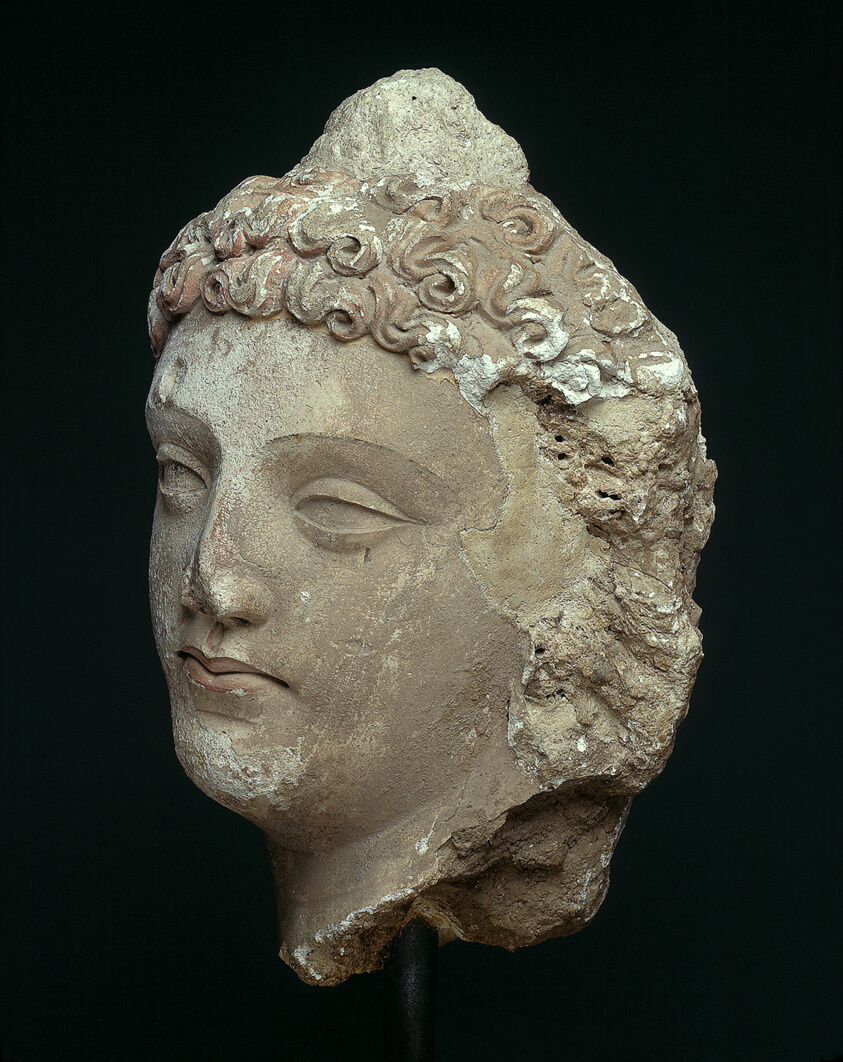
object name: Sculpture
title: Head of a Bodhisattva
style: South Asian, gandharan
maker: Afghanistan or Pakistan; Ancient region of Gandhara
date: 4th/6th century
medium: Stucco with traces of pigment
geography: Gandhara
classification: bust/head; stuccowork; sculpture; asian art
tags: religion, bodhisattva, Buddhism